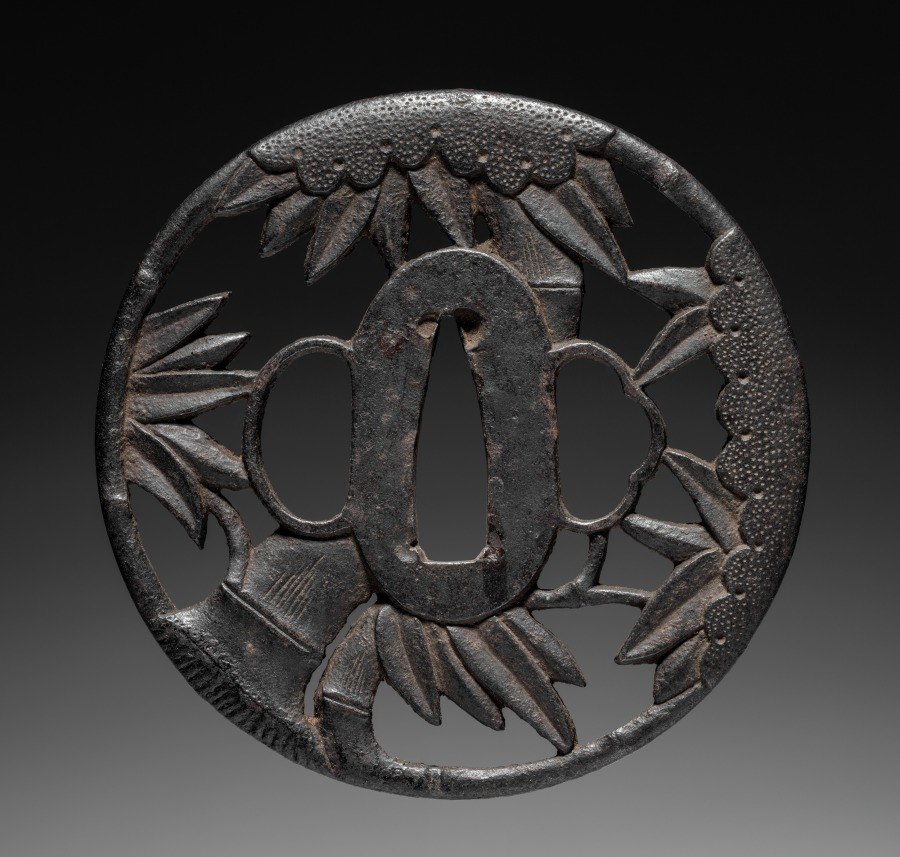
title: Sword Guard Tsuba) with Bamboo and Cloud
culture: Japan, possibly Edo period (1615-1868)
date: c. 1615–1868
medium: iron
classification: Arms and Armor